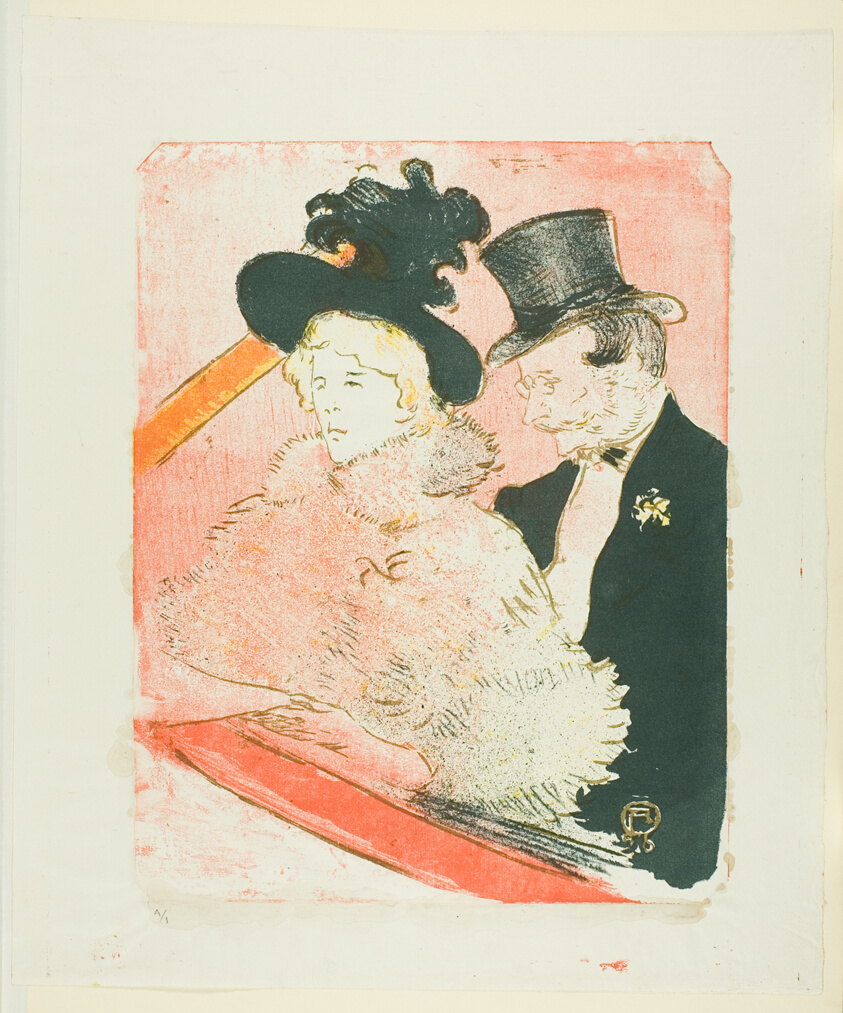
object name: Print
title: At the Concert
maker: Henri de Toulouse-Lautrec (French, 1864-1901)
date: 1896, printed 1946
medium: Color zincograph on ivory wove chine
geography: France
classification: zincograph; print; prints and drawing